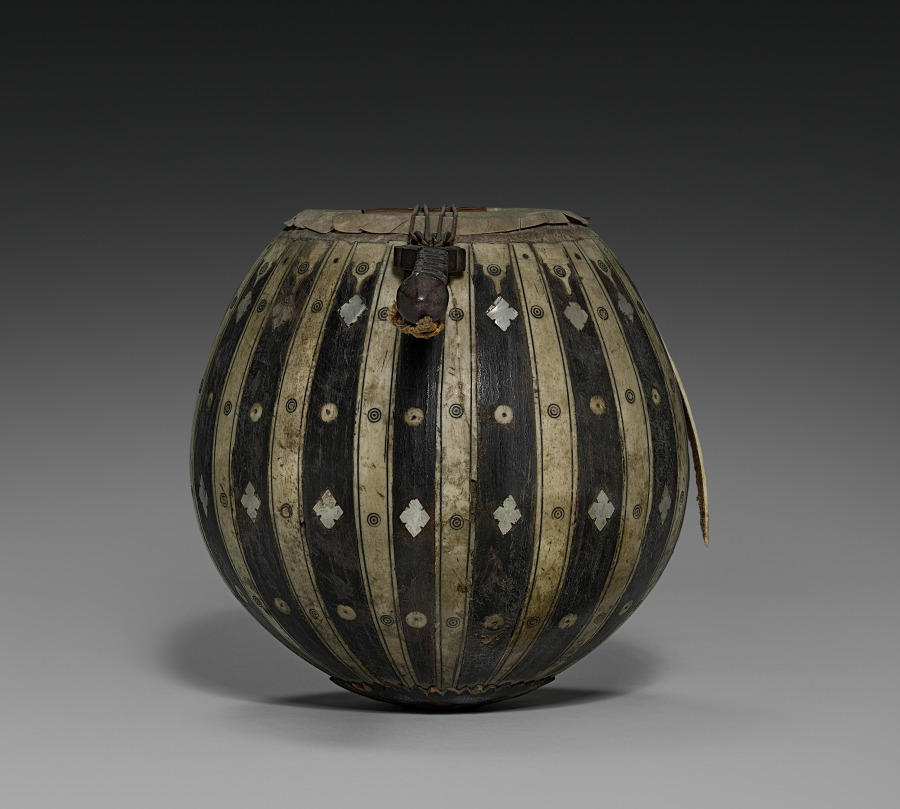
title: Kamānche (incomplete)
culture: Northern Iran (Caucasian, maybe Azerbaijan, or Kashmir)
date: 1875–1900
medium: Wood, hide, and bone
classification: Musical Instrument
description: Kamānche is a Persian term first used in the 10th century to describe an instrument that is sounded with a bow. From there, bowed instruments spread to Byzantium, Central Asia, the Far East, and then to Europe. In Egypt, it is known as the rabāb, a term known throughout the Islamic world from North Africa to Southeast Asia. The names of musical instruments often reveal origin, context, or musical function. In Europe, North Africa, and Asia where contact with Middle Eastern culture occurred, variations of Arabic and Persian terms for instruments are widespread. Usually, related names refer to similar instruments; however, this is not always true. Among these "floating terms" are the names zūrna, rabāb, kāmanja, nāy, and dombak.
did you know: The instrument's spike would be placed on the ground or today, on the knee, when it was played.